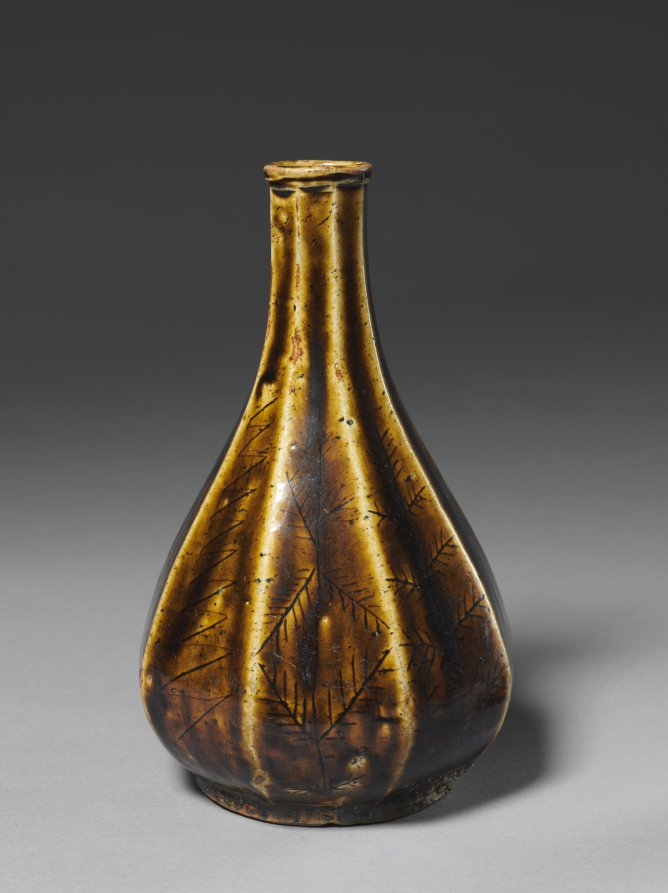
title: Eight-faceted Bottle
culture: Korea, Joseon dynasty (1392–1910)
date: 1800s-1900s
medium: stoneware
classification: Ceramic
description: Toward the end of the 1700s, multifaceted bottles like this one became popular with the growing demand from both the elites as well as the middle class. The dark-brown iron oxide pigment makes this eight-faceted bottle earthy, yet sophisticated.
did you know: The exquisite hue of this bottle is from iron oxide, also known as “purple oxide.”